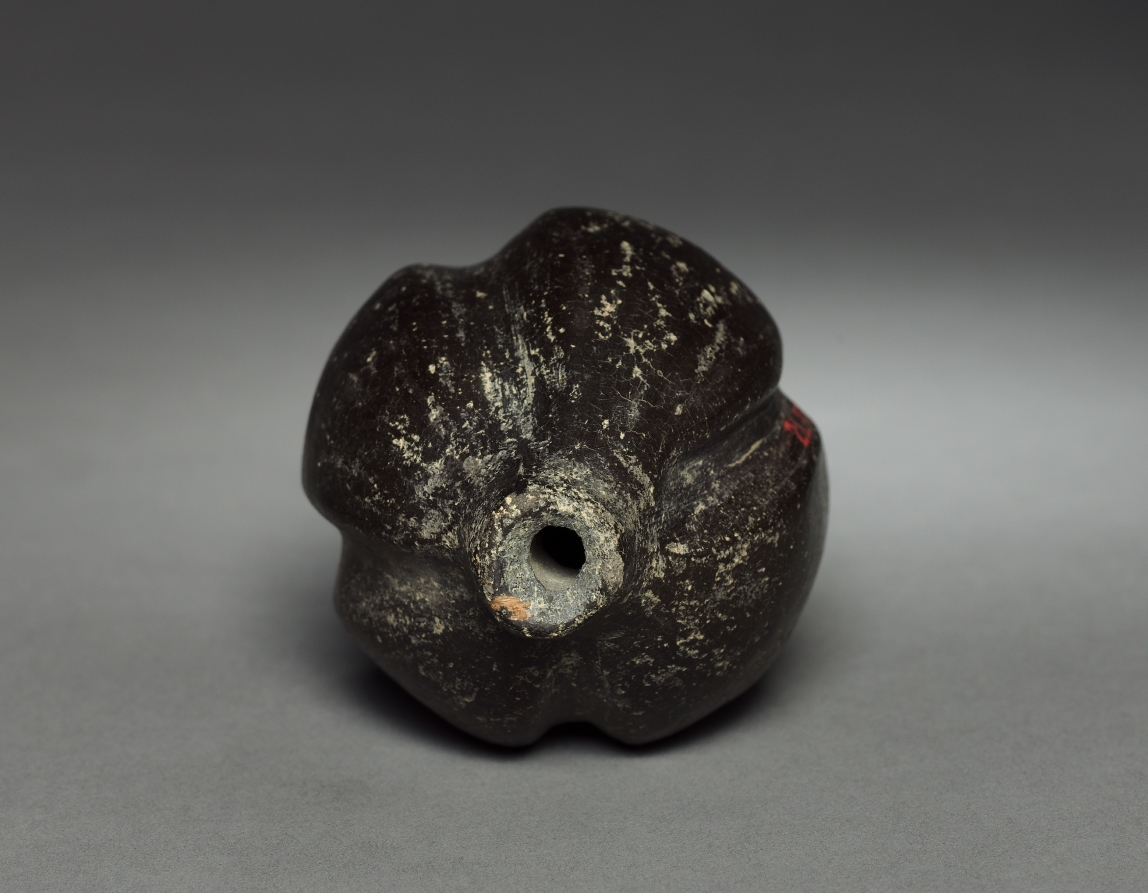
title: Fruit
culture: Colombia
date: before 1921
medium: pottery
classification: Ceramic